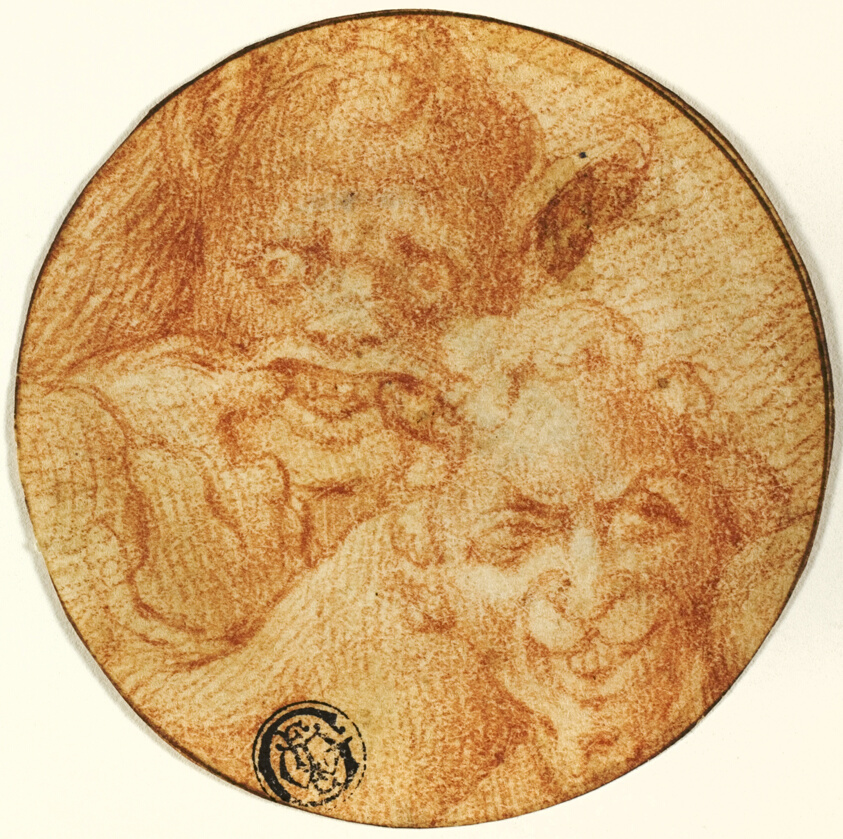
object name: Drawing and Watercolor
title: Two Devils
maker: After Michelangelo Buonarroti; Italian, 1475-1564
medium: Red chalk on ivory laid paper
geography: Italy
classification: chalk; drawings (visual works); prints and drawing